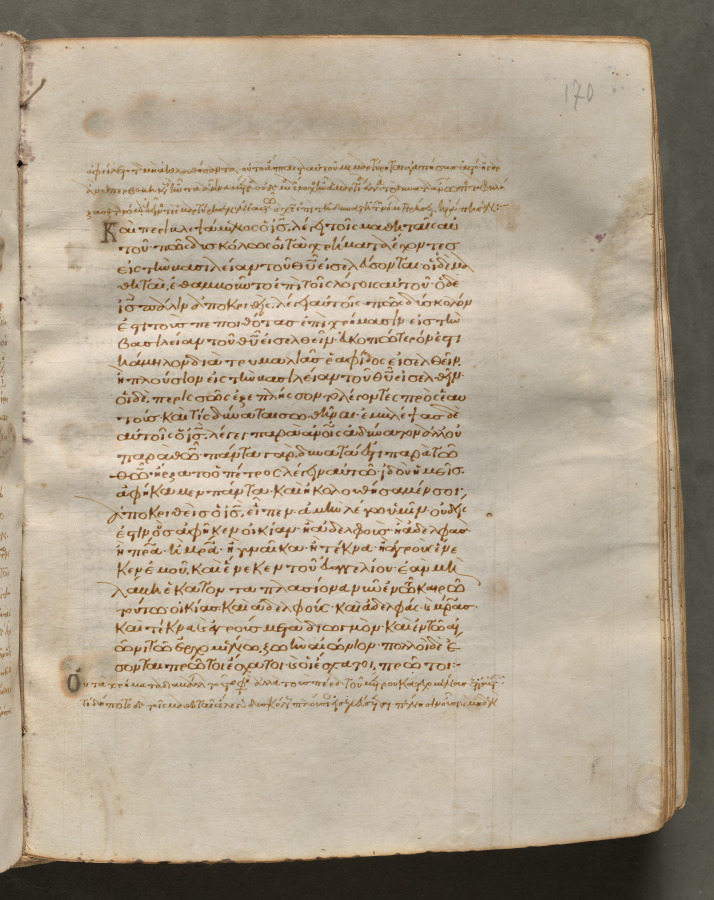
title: Text, folio 170 (recto), from a Gospel Book with Commentaries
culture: Byzantium, Constantinople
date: c. 1000–1100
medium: ink, tempera, and gold on vellum; leather binding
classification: Bound Volume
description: Each of the four gospels in this book opens on a page with brilliantly illuminated borders depicting the author of the text as well as birds-principally peacocks, symbols of the immortality of the soul-and fountains, representing the fountain of life and the salvation of the soul. This volume consists of 428 leaves with texts in Greek. Its level of sophistication suggests that it was probably written and decorated in a monastery in Constantinople.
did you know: Gospel Books were carried in procession through Byzantine churches.